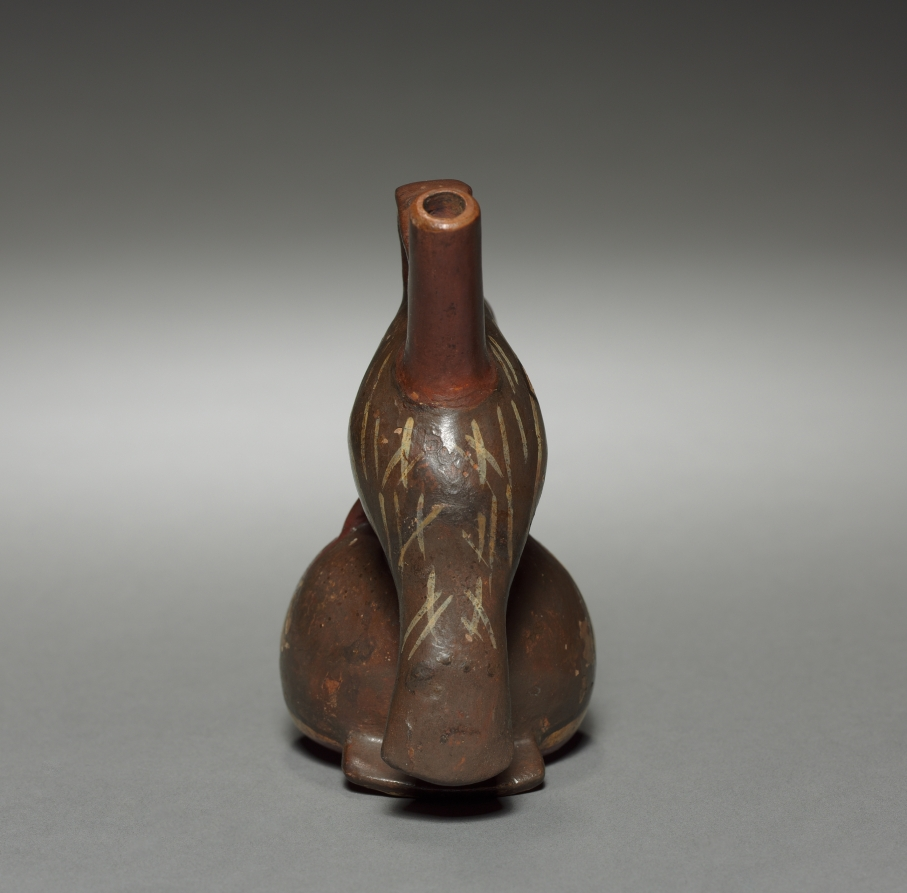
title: Vessel with Condor and Human Head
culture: Peru, Tiwanaku style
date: 400–1000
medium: pottery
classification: Ceramic